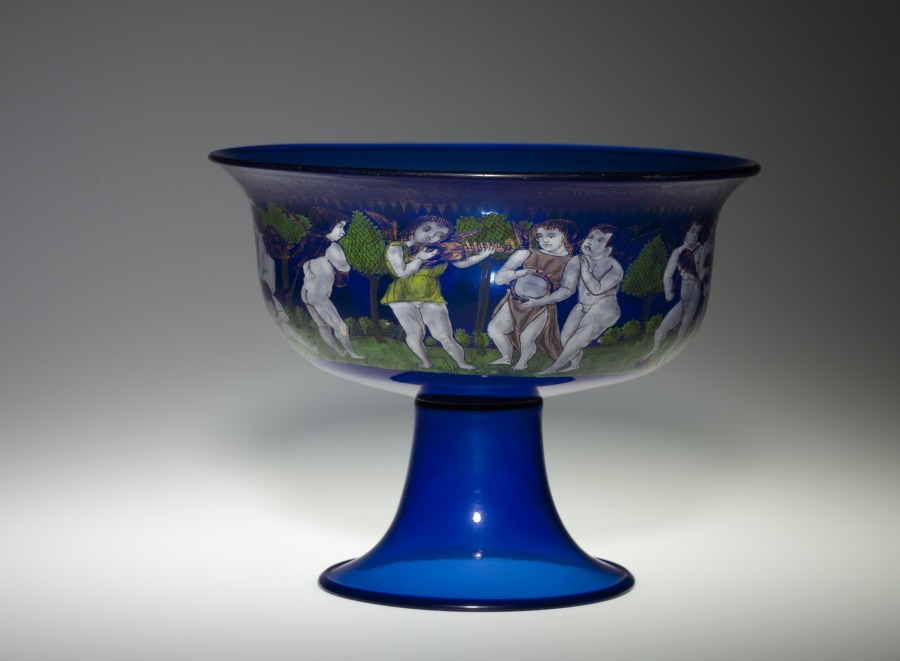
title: Tazza with a Frieze of Putti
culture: Italy, Venice (Murano), 19th century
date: 1800s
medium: enameled blue glass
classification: Glass